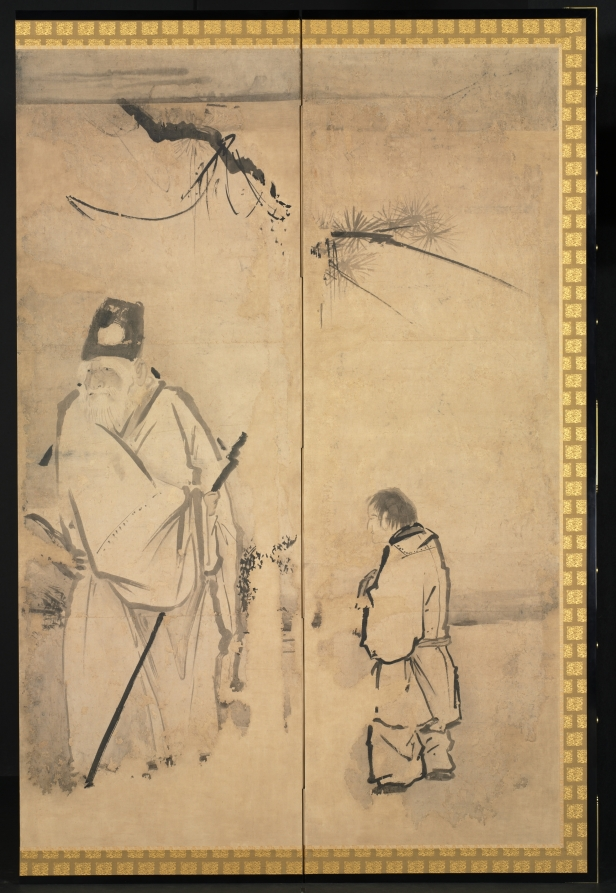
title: Four Elders of Mt. Shang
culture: Japan, Edo period (1615–1868)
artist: Kano Tan’yū (Japanese, 1602–1674)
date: 1600s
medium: pair of six-fold screens; ink on paper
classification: Painting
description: The Kano school was a group of professional artists patronized by the shogun from the late Muromachi period to the Edo period. The group adopted themes of reclusiveness to convey the importance of loyalty to the shogunate. A leader of the Edo Kano school, Kano Tanyu paired Seven Sages of the Bamboo Grove and Four Elders of Mt. Shang to reference a painting of the same theme attributed to Kano Motonobu. Seven Sages of the Bamboo Grove refers to the elites who escaped the social chaos of China’s Wei-Jin period (AD 200s–400s); they fled to a secluded bamboo grove where they could express themselves freely, enjoying pure conversation, music, and wine. The other screen, Four Elders of Mt. Shang, depicts the scholars who left the turbulence of the late Qin dynasty to pursue their scholarly interests in seclusion on Mt. Shang in Shanxi province.